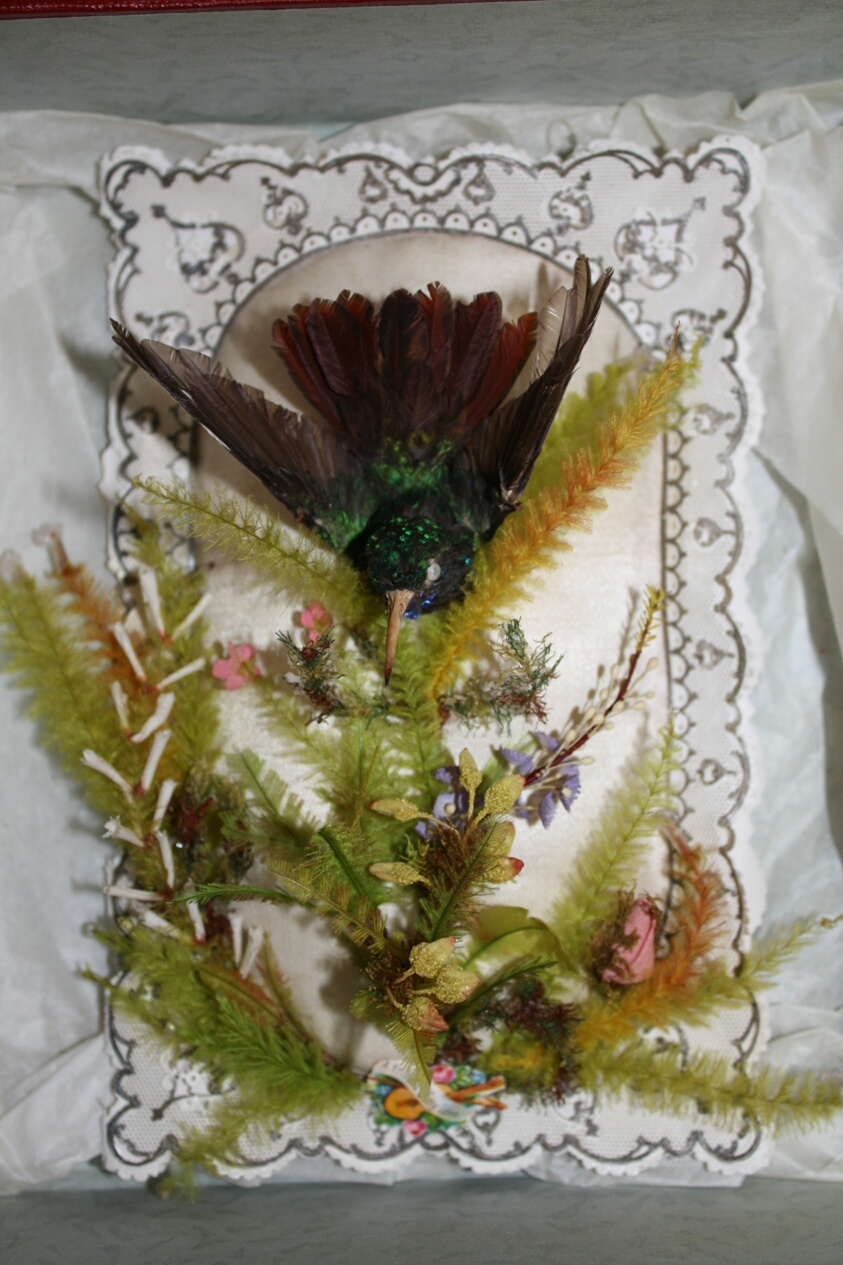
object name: Mixed Media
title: Hummingbird Valentine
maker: possibly Jonathan King; British, active 1845-1869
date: 1845/1869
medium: Cloth and feather flowers and hummingbird with die-cut color lithographic device, and printed perforated lace paper borders on white satin cushion, housed in red box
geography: England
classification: collage; valentine; prints and drawing; mixed media